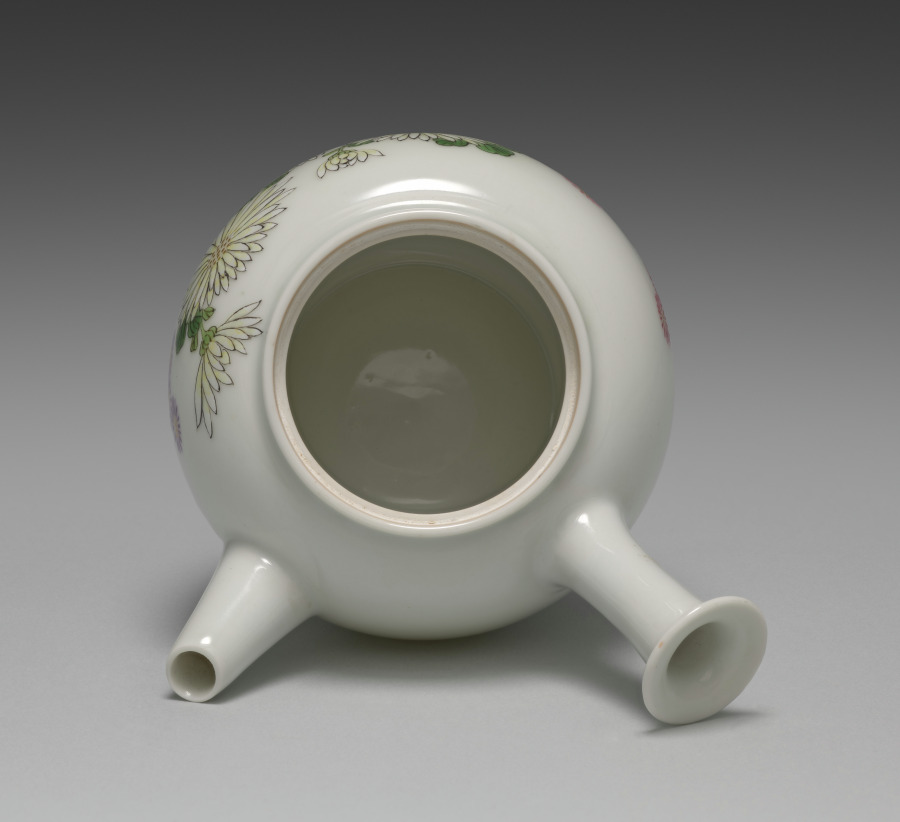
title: Teapot with Chrysanthemums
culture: Japan, Meiji period (1868–1912)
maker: Seifū Yohei III (Japanese, 1851–1914)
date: 1912–14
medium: Porcelain with overglaze color enamel and gold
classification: Ceramic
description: This teapot with recessed lid has a bold, realistic design of pale yellow and white chrysanthemums rendered in overglaze color enamels and dotted gold centers. Black contour lines define the yellow and white flowers and their green stems and leaves. Small pink and purple chrysanthemums are rendered as simple motifs, their shapes defined in contrast to the white ground of the pot.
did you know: This side-handled teapot is designed for brewing and serving sencha.